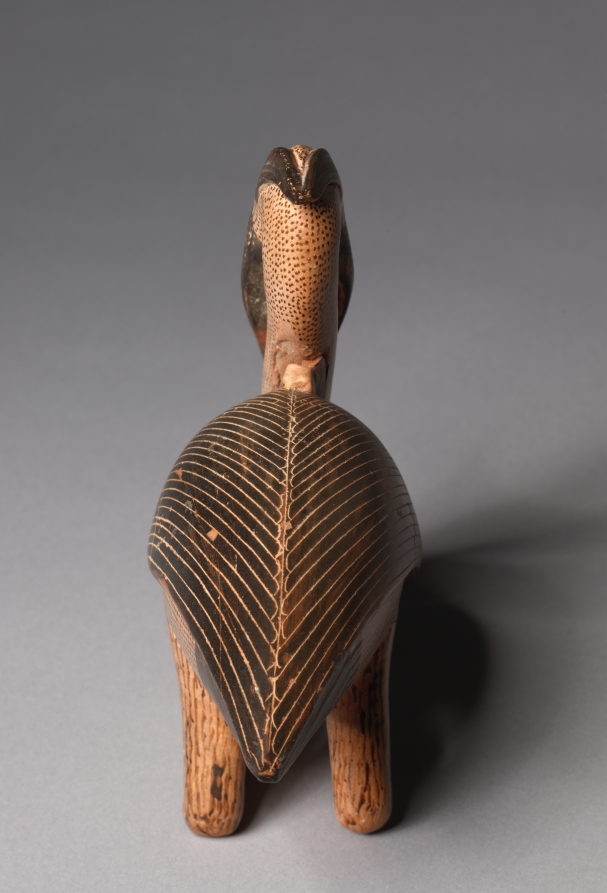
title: Heron-Shaped Figure Vase (Oil Vessel)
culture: East Greek, probably Milesian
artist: assigned to Robertson's Group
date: c. 580 BCE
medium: ceramic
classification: Ceramic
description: In the 6th century BC, a particular type of vessel for scented oil was produced in Corinth, Rhodes, and along the western coast of Asia Minor. Primarily animal forms, they are made of unglazed fired clay with painted decoration. This example in the form of a heron was crafted by a Milesian potter. The bird rests with its delicately curving and counter-curving neck nearly touching the ground; the feathers are defined by incision and painted black slip.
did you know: An aryballos is a vessel that contained scented oils, this one in the shape of a heron.